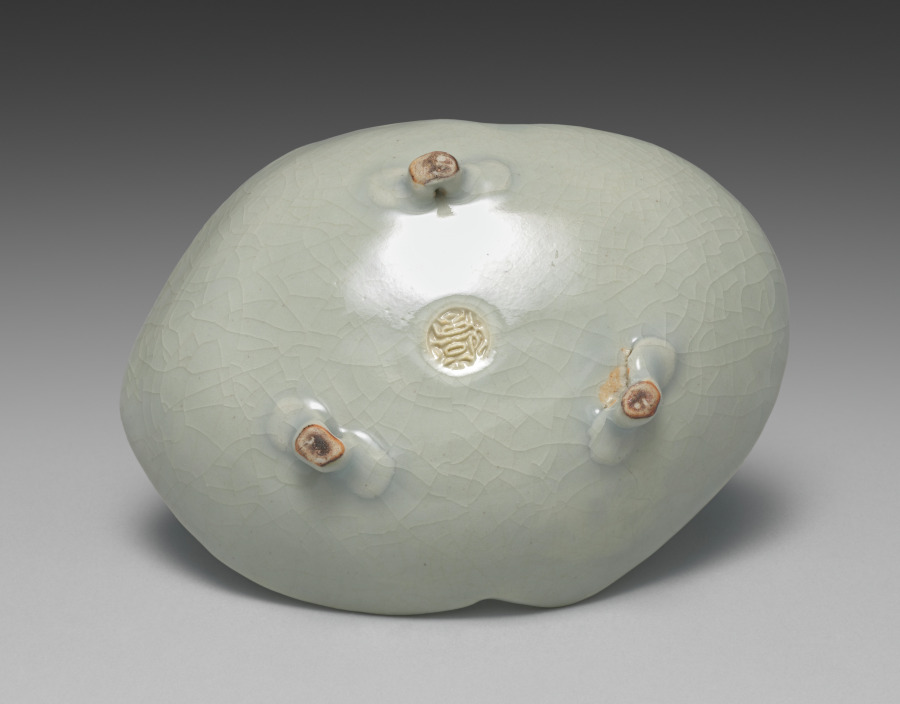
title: Dish from Dishes with Matching Shells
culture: Japan, Meiji period (1868–1912)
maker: Seifū Yohei III (Japanese, 1851–1914)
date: 1893–1914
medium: One of a pair of dishes; porcelain with celadon glaze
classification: Ceramic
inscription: 清風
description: Yohei III’s main output for his sophisticated clientele was in the form of tea sets and dining sets. He created a range of dishes in green glazes. He often produced in pairs, sets of five, or sets of ten. This pair of shell dishes have a box lid interior attestation by Yohei IV that the dishes were made by Yohei III with a cracked-ice (hyōretsu) pattern in the glaze, omitting reference to any glaze coloration.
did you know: These shell-shaped dishes are of the saucer type, suitable for dipping sauces.